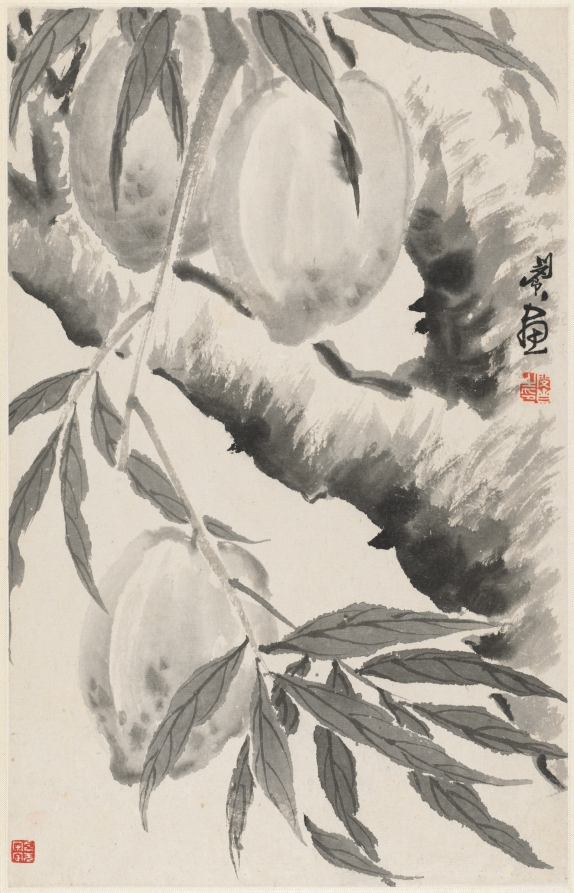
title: Peaches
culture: China, Qing dynasty (1644-1911)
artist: Min Zhen (Chinese, 1730–after 1788)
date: 1788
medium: album leaf, ink on paper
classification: Painting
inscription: Inscription by Min Chen on the last leaf: I have a habit of collecting strange rocks. My friend Tai-li shan-jen* treasures my paintings as much as I treasure strange rocks. Once we agreed to exchange what we love with each other. However, my busy activities have kept me from carrying this out. This summer I realized that this strange rock has been sitting in my studio for five years, so I painted this to fulfill my old promise. As a record, I chose the grotesque cliff in the last scene of this twelve-leaf album. Cheng-chai, Min Chen inscribed this on the sixth day of the sixth month [July 9] of the wu-shen year [1788]. * Tai-li shan-jen is Wang Li [tzu: Li-fu] tr. Hou-mei Ishida Six seals appearing on the leaves: Min Chen, Cheng-chai, Ching-ch'iao, Chen, Liao-t'ang, Min Chen chih-yin.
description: Min Zhen, who was orphaned at age 12 and developed an eccentric personality, was trained by Tang Yin (1682–1756), a writer, playwright, and superintendent of the imperial porcelain workshops in Jingdezhen. The connection to him may have enabled Min to stay in Beijing for a decade from around 1773. It is not clear whether he ever resided in Yangzhou, but his style is in many instances reminiscent of that of Yangzhou artist Huang Shen. This album demonstrates Min’s versatility and mature style in the last years of his life.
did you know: The peach is a symbol of immortality.